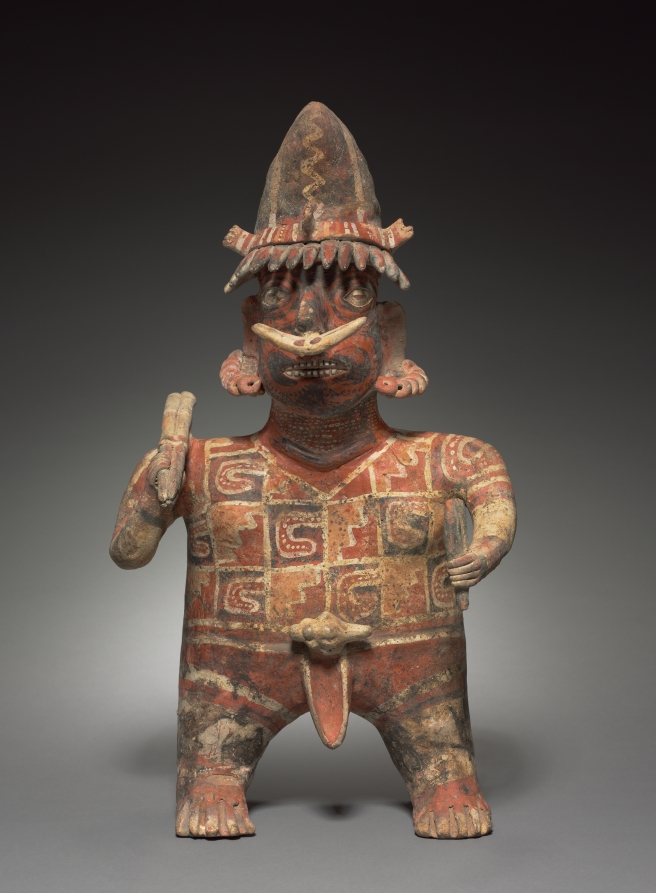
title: Standing Male Figure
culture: Mexico, Nayarit, Ixtlan del Rio Style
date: c. 100 BCE–300 CE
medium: earthenware with colored slips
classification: Sculpture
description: Like his female companion, this male figure is portrayed in all his finery. He carries spears, indicating that he is a hunter or warrior, and his confident grin conveys aggression and vitality.